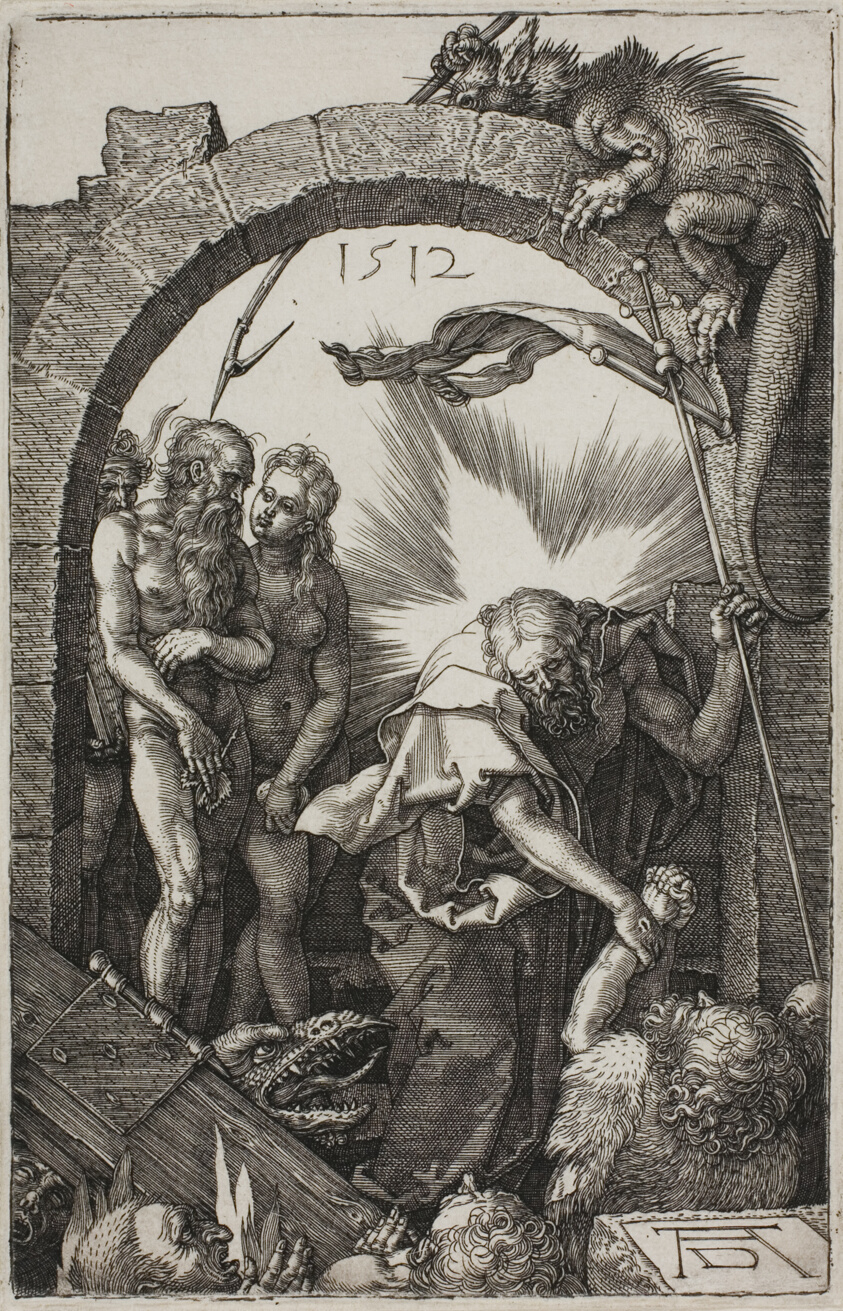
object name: Print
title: Harrowing of Hell; Christ in Limbo, from The Engraved Passion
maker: Albrecht Dürer (German, 1471-1528)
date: 1512, published 1513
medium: Engraving in black on ivory laid paper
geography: Germany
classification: engraving; print; prints and drawing; paper